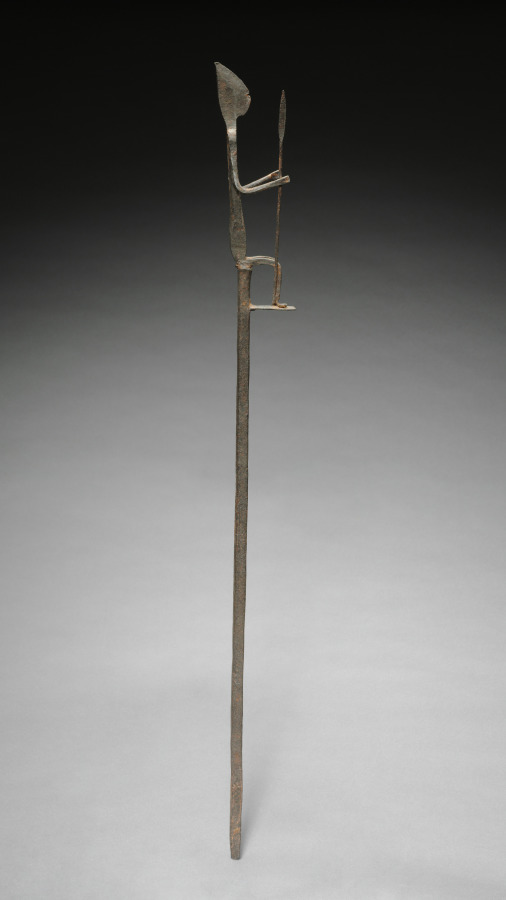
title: Staff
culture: Africa, West Africa, Mali, Bamana-style blacksmith-carver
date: 1900s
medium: Iron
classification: Implements